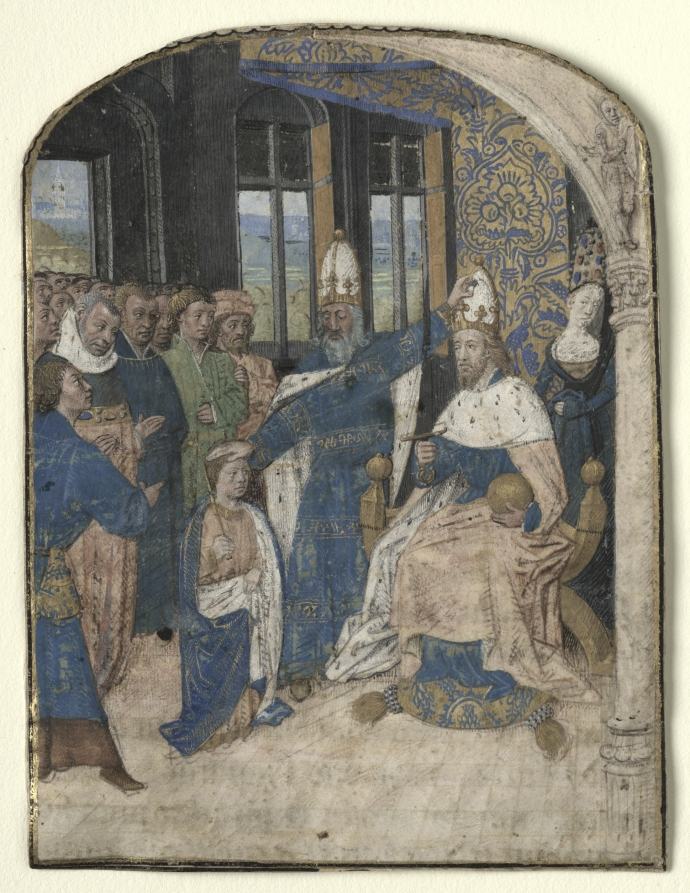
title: Miniature from a Speculum Historiale: Claudius Designates Nero as His Successor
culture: France, 15th century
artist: Master of Jouvenel des Ursins (French, active 1447–60)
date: 1447–60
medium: ink, tempera, and gold on vellum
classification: Manuscript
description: This miniature came from a sumptuous copy of the Speculum Historiale (Mirror of History) written by 13th-century Dominican friar Vincent de Beauvais. It covers a history of the world from creation through to De Beauvais’s own time. Here a seated Claudius, emperor of Rome (AD 41–54), is appointing a kneeling Nero, his grand-nephew and adopted stepson, to be his successor. Although an event from antiquity, contemporary dress and setting was used and would have been familiar to the reader. The original work remained much in demand and numerous copies were produced after De Beauvais’s lifetime. This miniature belonged to a deluxe copy made for René d’Anjou (1409–1480), king of Jerusalem and a major patron of art and books.